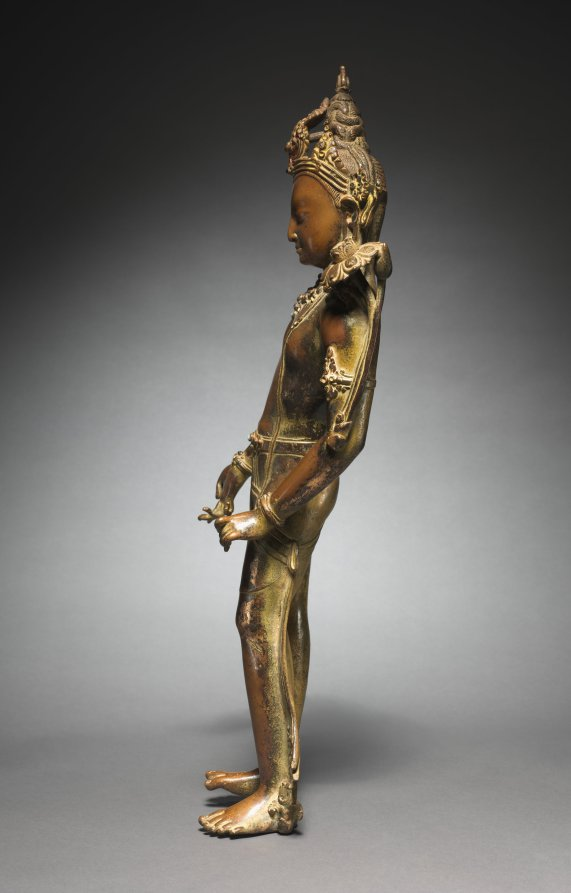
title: Avalokitesvara Padmapani: Bodhisattva of Mercy Bearing a Lotus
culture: Nepal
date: c. 1000s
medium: bronze with gilding, pigment, and semiprecious stones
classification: Sculpture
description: Venerated by Buddhists across the world as the perfect embodiment of compassion for all beings, this bodhisattva-a being only one stage away from complete enlightenment-holds his right hand out gently in the gesture of gift-giving. In his left hand, he once grasped the stem of a lotus flower that blossoms over his left shoulder, indicative of the abundant benefits that result from acts of loving kindness. All bodhisattvas wear royal garments and jewels, in reference to the historical Buddha’s early life as a prince, prior to his achievement of enlightenment through meditations in the forest. In the center of his crown is the tiny seated image of the meditating Buddha Amitabha that identifies this figure as Avalokitesvara specifically. Nepalese bronzes of the 11th century are solid cast and have an exceptionally high copper content in the alloy that makes the bronze difficult to manage during fabrication. The color achieved by the extra copper creates a distinctive warmth and softness in the sculpture. The flexed toes of the right foot and the swinging to one side of the gathered ends of his garment impart a sense of dynamism to his ongoing act of giving. His facial expression is sweet and placid but sharp, as though he is keenly aware of the sufferings of the world.